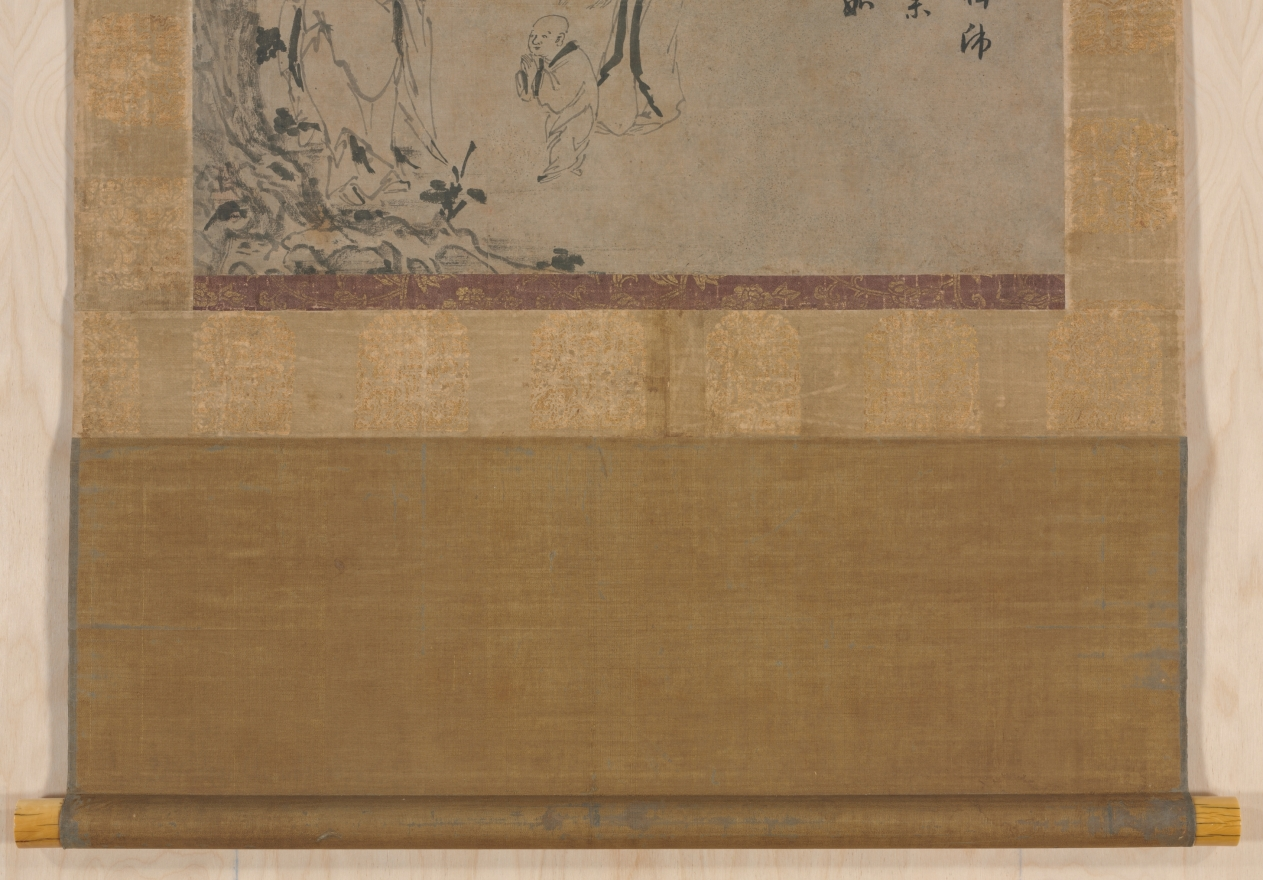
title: The Second Coming of the Fifth Patriarch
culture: China, Yuan dynasty (1271-1368)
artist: Yintuoluo (Chinese, c. 1285-c. 1355)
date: c. mid-1300s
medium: section of a handscroll mounted as a hanging scroll, ink on paper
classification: Painting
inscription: [印] 人言洞裡桃花源，未必人間有此枝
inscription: 此子無爺只有娘，禪師莫問幾時生。 青松未老黃梅飄，兩世都如夢一場。 [印] 楚石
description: A small boy, accompanied by his mother, is closing his hands in greeting to an old monk who has a young attendant standing behind him. Scholars believe the scene is a meeting between the fourth patriarch of Chan Buddhism, Daoxin 道信, and the little boy, who was the reincarnation of an old monk named Zaisong daozhe 栽松道者 (Pine Planter). They had encountered before, during which Daoxin advised the Pine Planter to endure a reincarnation as he was too old to reach enlightenment. This painting is done by Yintuoluo, an artist renowned for his simple and unadorned style.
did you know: This painting is just a section of a handscroll that has been remounted as a hanging scroll.